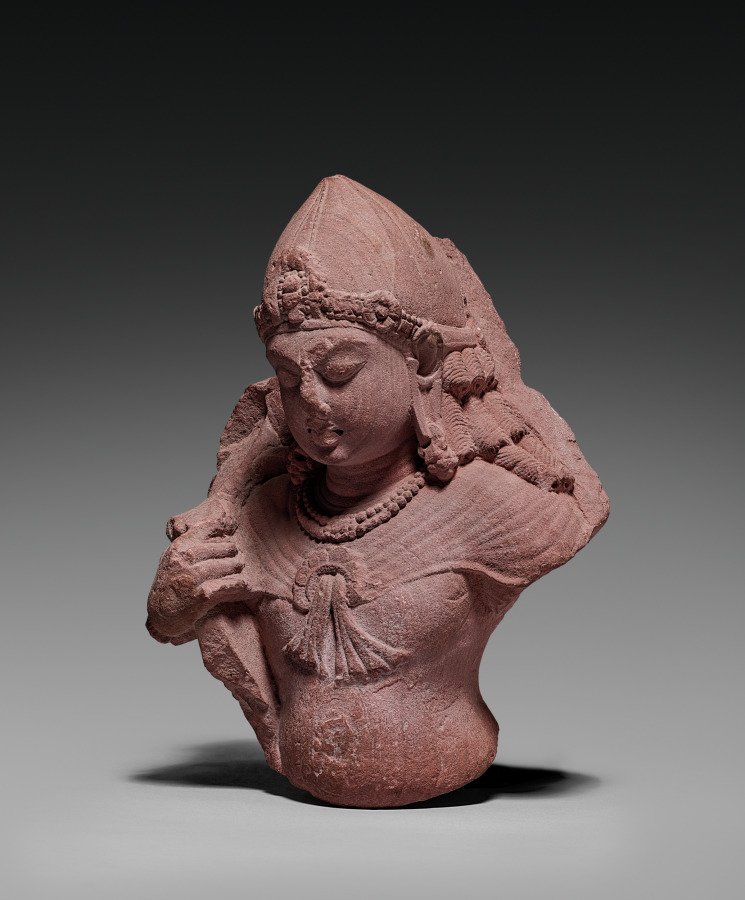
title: Attendant of Surya, the Sun God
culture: India, Mathura, Gupta Period (320-647)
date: 320–650 CE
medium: sandstone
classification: Sculpture